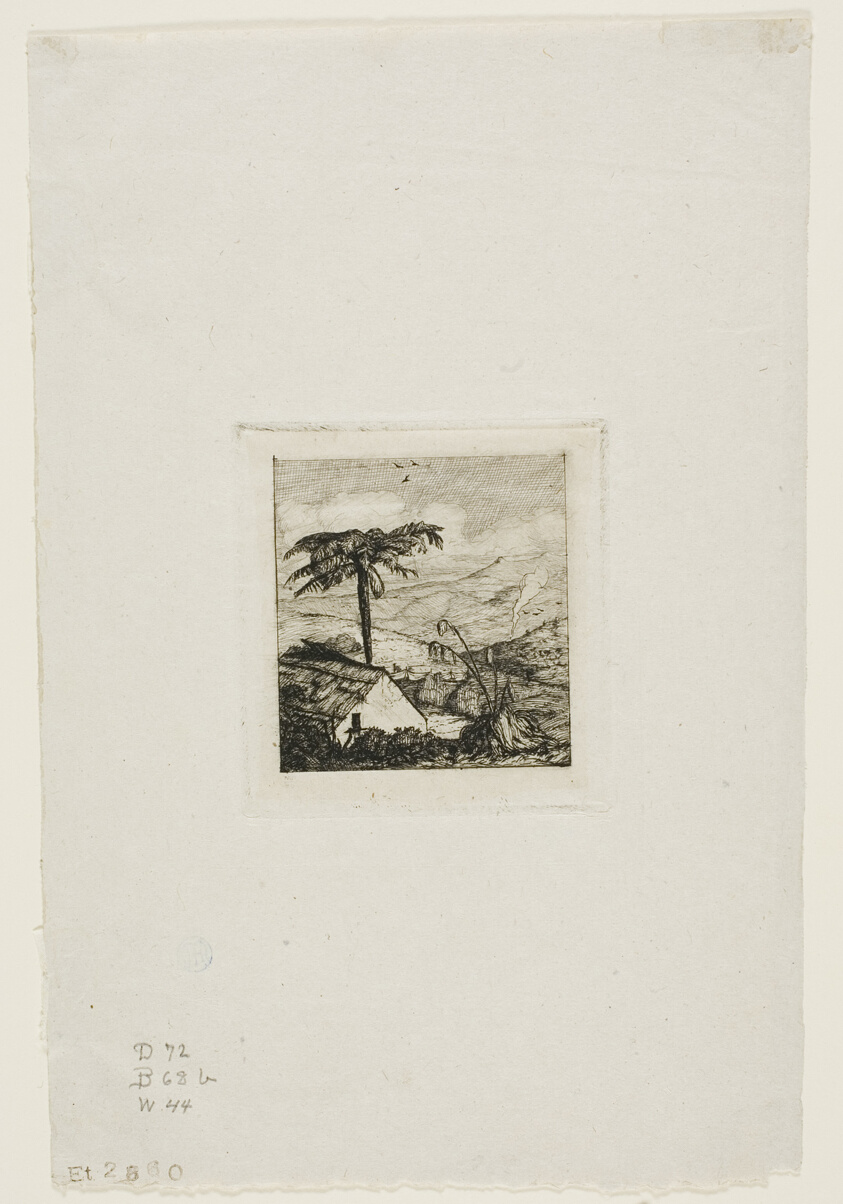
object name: Print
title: The Old Soldier's Thatched Cottage, Akaroa, 1845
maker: Charles Meryon (French, 1821-1868)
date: 1866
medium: Etching and drypoint on grayish-ivory laid paper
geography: France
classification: etching; print; prints and drawing